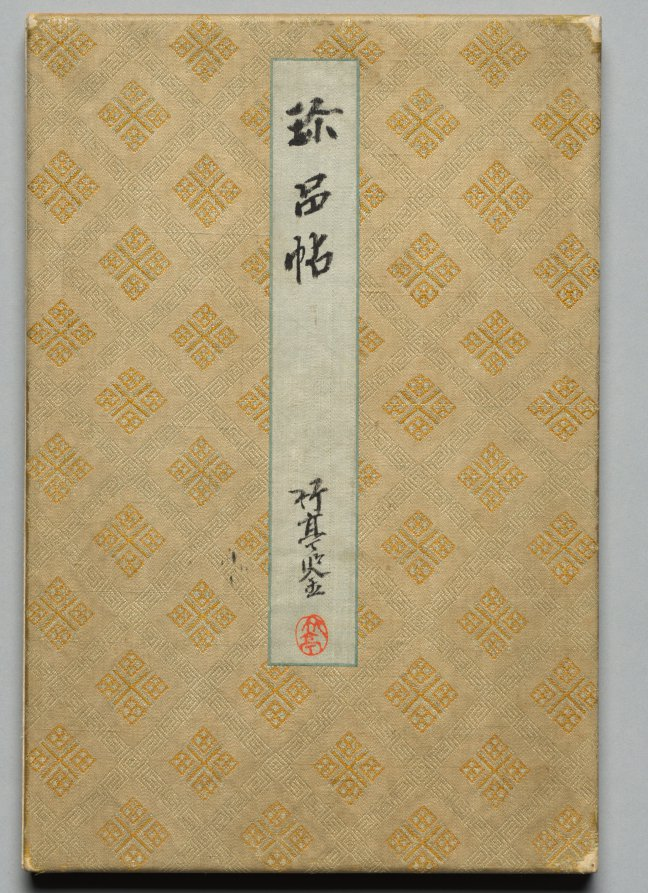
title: Album of Precious Works from Famous Early Modern Calligraphers and Painters (Volume 1)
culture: Japan, Edo period (1615–1868)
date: late 1700s to mid-1800s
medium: One of a pair of folding albums; ink and color on silk and paper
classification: Portfolio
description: This is the first of two albums boxed together with an external title reading Famous Early Modern Calligraphers and Painters. It begins with a lengthy inscription in Chinese by the Japanese artist Rai San'yō (1780–1832) dated to 1817, and concludes with another, undated, by Tanomura Chikuden (1777–1835). In between, there are undated poems in Chinese by other Japanese artists, Nukina Kaioku (1778–1863), Rai Shunpū (1753–1825), Rai Kyōhei (1756–1834), and Kan Sazan (1748–1827), as well as paintings by Okada Hankō (1782–1845), Totoki Baigai (1749-1804), Nakabayashi Chikutō (1776-1853), Uragami Shunkin (1779-1846), Watanabe Kazan (1793-1841),Tsubaki Chinzan (1801-1854), and Nukina Kaikoku. While most of the paintings are not dated, those that are indicate that the group was painted over a large span of time, rather than on a single occasion. Nakabayashi Chikutō’s Chinese hermit treads a waterfall-dominated landscape dated 1808, while Nukina Kaikoku’s solitary Chinese boatman beneath a flock of geese is from 1849. The paintings are landscapes or floral images and follow recognizable Chinese brush methods transmitted to Japan through a variety of methods including printed manuals. The plants have symbolic meanings, sometimes related to their names in Chinese, which may be homonyms for terms like success or achievement. They often recall human qualities or desires, such as hardiness or longevity. The calligraphers and painters whose works are represented in the album were all deeply interested in Chinese culture. They were especially attracted to the idea they found in Chinese society of a community of educated friends who shared works in prose, poetry, and painting among one another through correspondence or gatherings. The ideal was a group who were not professional artists, creating works for clients, but a group who produced works to nurture friendships and cultivate their own minds. The cover of the album has a title slip reading Album of Precious Works, and is signed Mirror of the Bamboo Pavilion, or Chikuteikan (竹𠅘鉴), with a round, red seal reading Chikutei. This is a pseudonym used most likely by a Japanese person interested in calligraphy composed in Chinese and paintings with Chinese styles and themes. The name evokes a pavilion set in a bamboo grove, an image strongly associated with China in Japan. Pseudonyms of this type were and continue to be used by those engaged in cultural pursuits such as poetry composition, painting, and collecting art. Having such a name takes one out of the normal business of life, and transports one to a space of creativity and aesthetic appreciation.